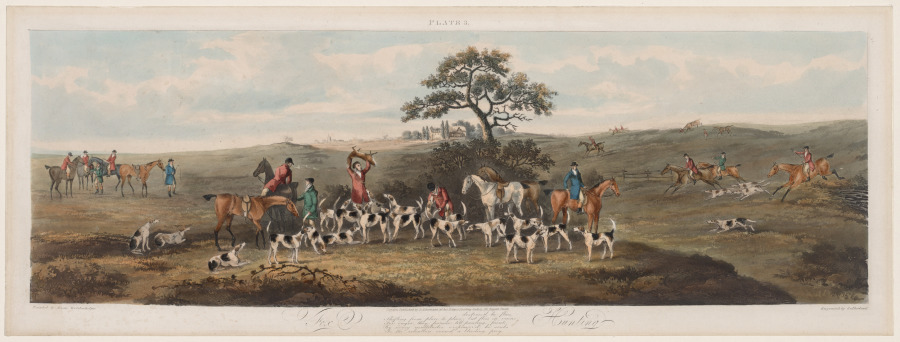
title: Fox Hunting, No. 3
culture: England, 19th century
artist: Thomas Sutherland (British, 1785–1838)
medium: aquatint and etching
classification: Print